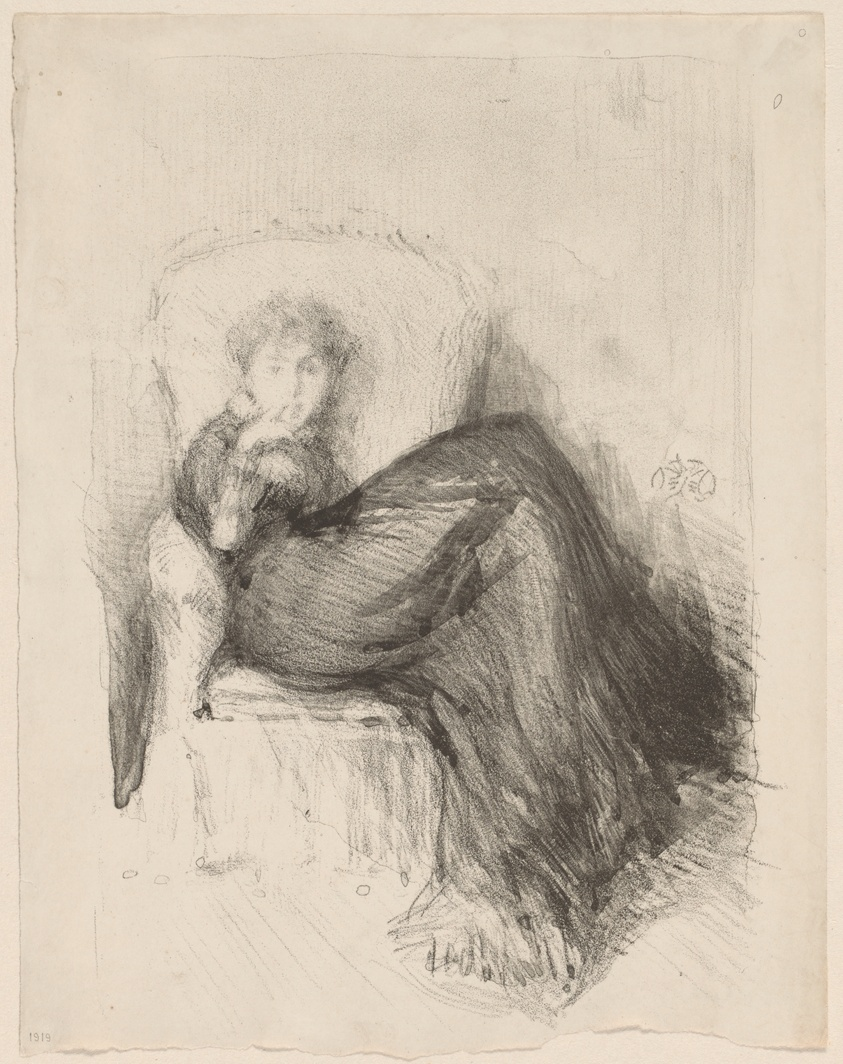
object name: Print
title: Study: Maud Seated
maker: James McNeill Whistler (American, 1834-1903)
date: 1878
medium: Lithotint in black, with scraping and roulette, on ivory wove proofing paper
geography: United States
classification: lithotint; lithograph; print; prints and drawing; paper